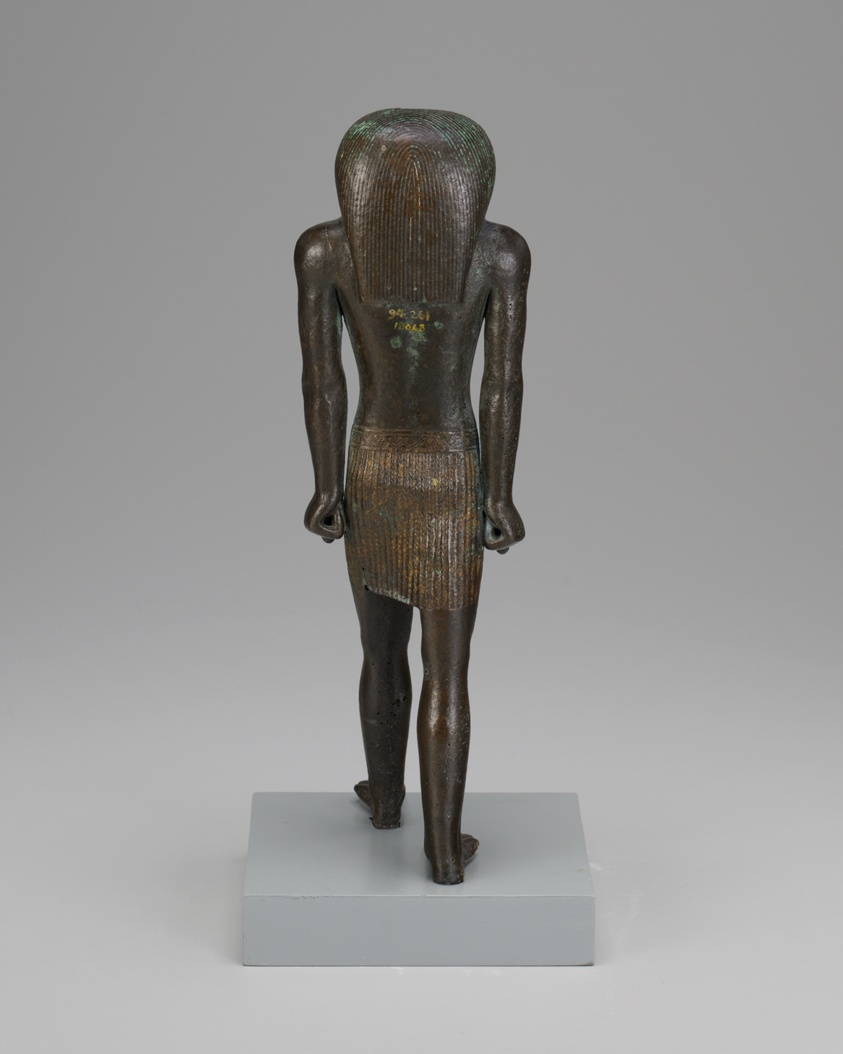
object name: Sculpture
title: Statuette of Re-Horakhty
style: third intermediate period, ancient, egyptian, twenty-fifth dynasty, twenty-first dynasty, twenty-fourth dynasty, twenty-second dynasty, twenty-sixth dynasty, twenty-third dynasty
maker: Egyptian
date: Third Intermediate Period-Late Period, Dynasty 21–26, about 1069–525 BCE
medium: Copper alloy with gilding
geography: Egypt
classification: statuette; bronze; metal; sculpture; ancient art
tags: gods (deities), birds, men, suns, Hieroglyphs, falcons